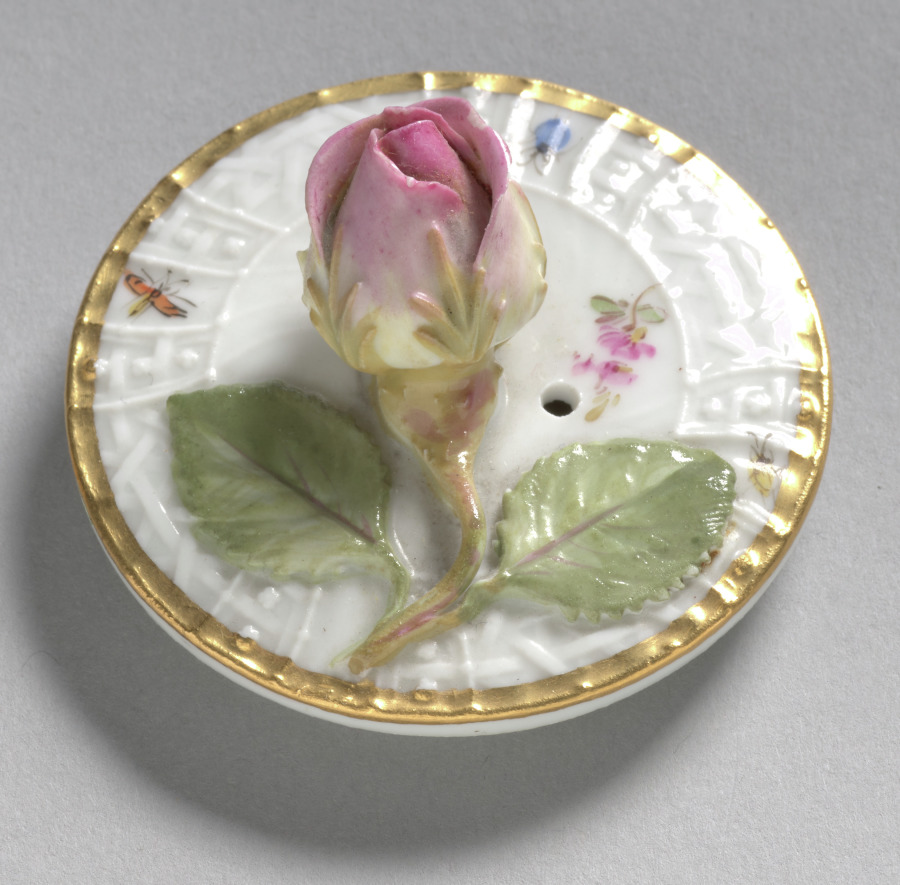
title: Lid for a Teapot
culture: Germany, Meissen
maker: Meissen Porcelain Factory (German, est. c. 1710)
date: c. 1750–70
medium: porcelain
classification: Ceramic